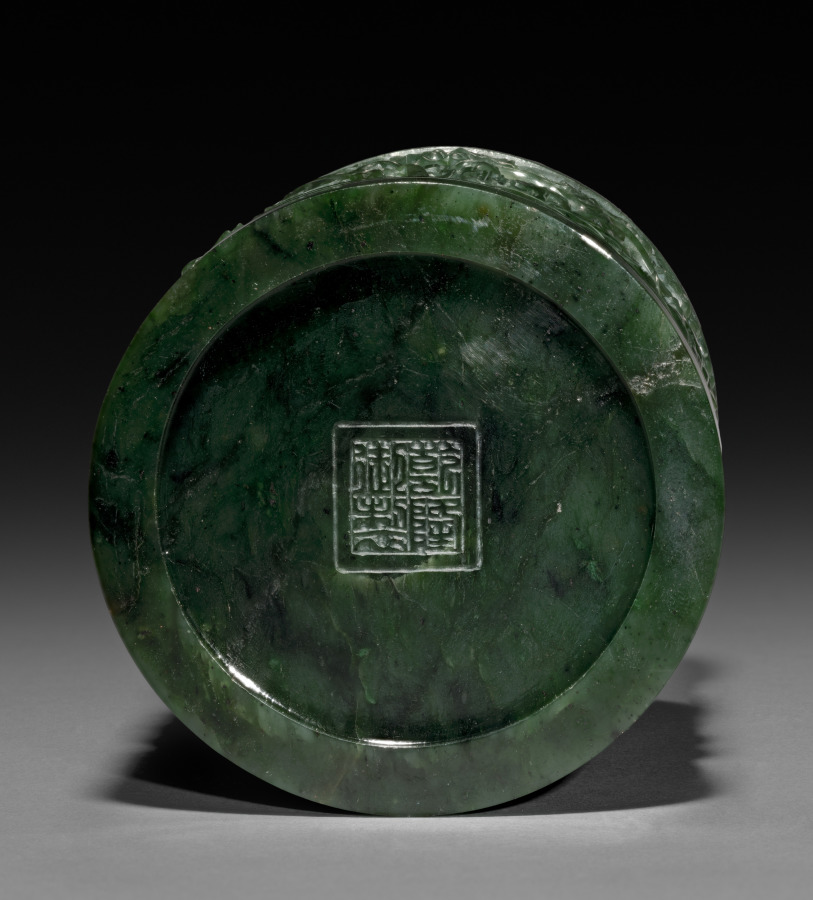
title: Brush Holder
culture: China, Qing dynasty (1644-1911)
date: 1800s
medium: spinach jade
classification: Jade